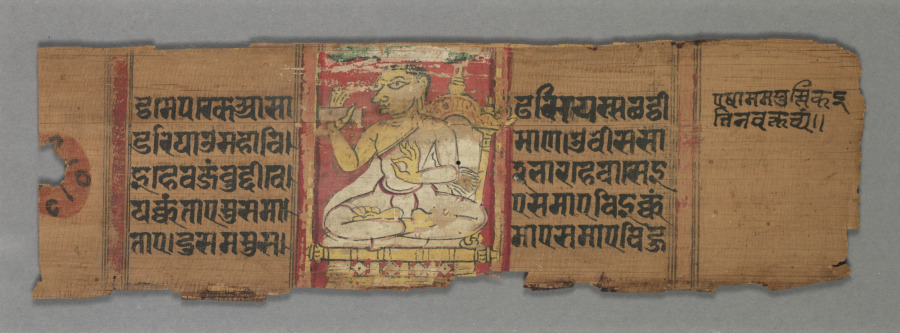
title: A Monk Preaching: Folio 2 (recto), from a Kalpa-sutra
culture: Western India, Gujarat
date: c. 1275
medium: gum tempera and ink on paper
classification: Painting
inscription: [[right margin]] esa mama pustika iti na vaktavyam